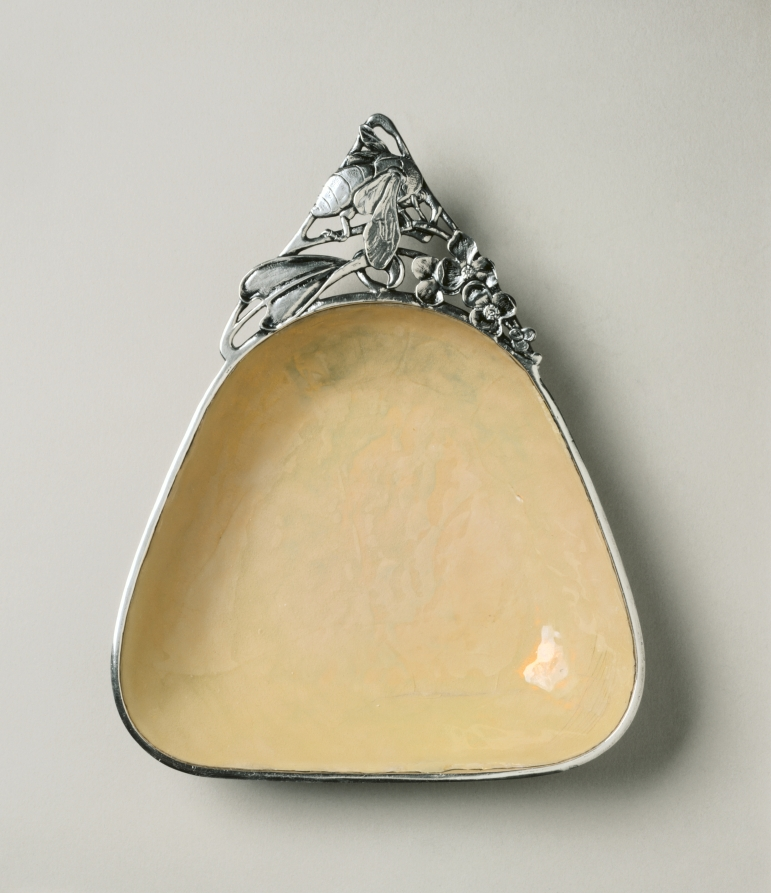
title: Dish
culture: America, Ohio, Cleveland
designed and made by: Horace Potter (1873–1948)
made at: Potter Studios (American)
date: c. 1910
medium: silver and enamel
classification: Silver